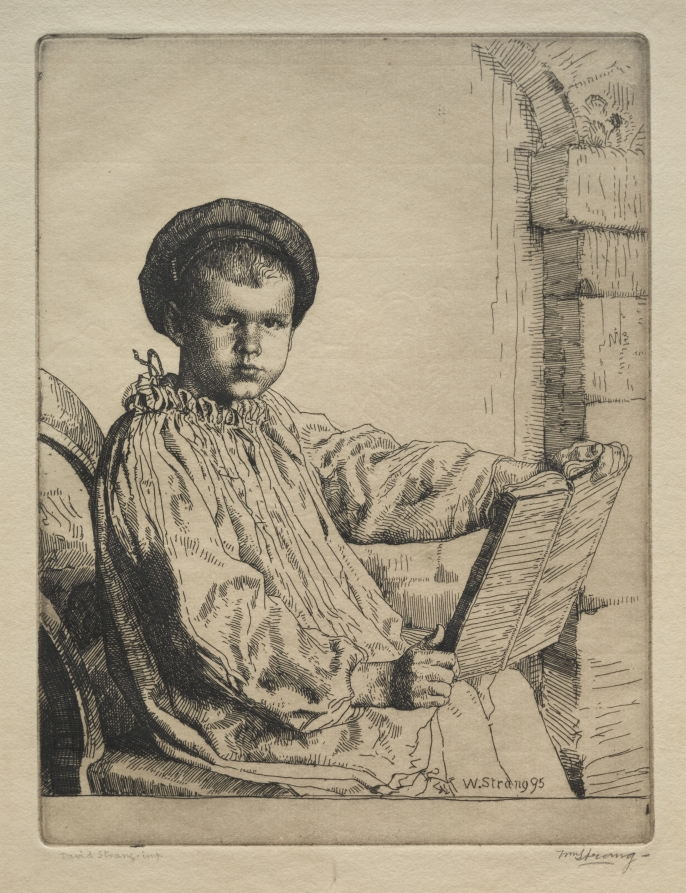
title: David Strang, No. 1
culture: England, 19th century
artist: William Strang (British, 1859–1921)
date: 1895–1896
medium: etching and engraving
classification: Print